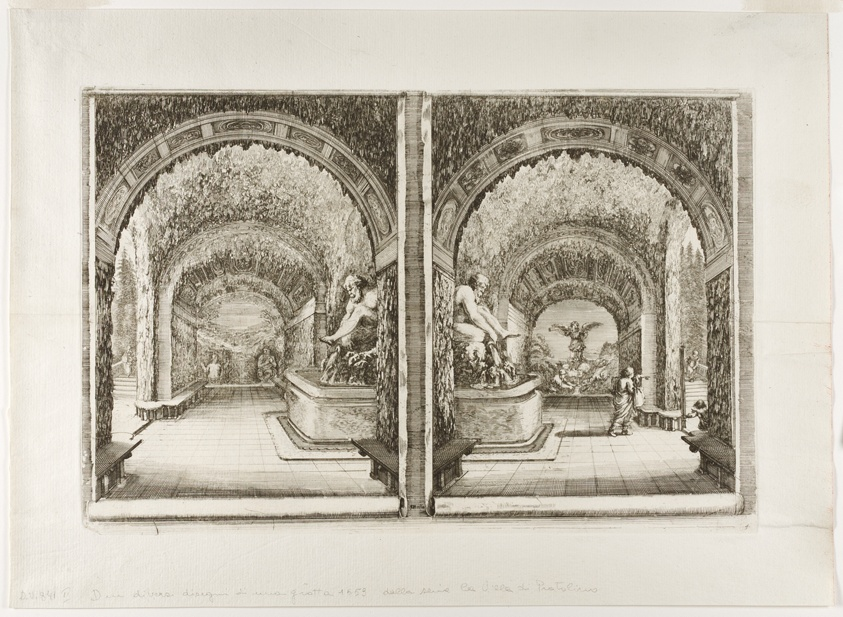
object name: Print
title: The Grotto of Pan and Fame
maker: Stefano della Bella (Italian, 1610-1664)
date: 1653/55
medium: Etching on ivory laid paper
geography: Italy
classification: etching; print; prints and drawing